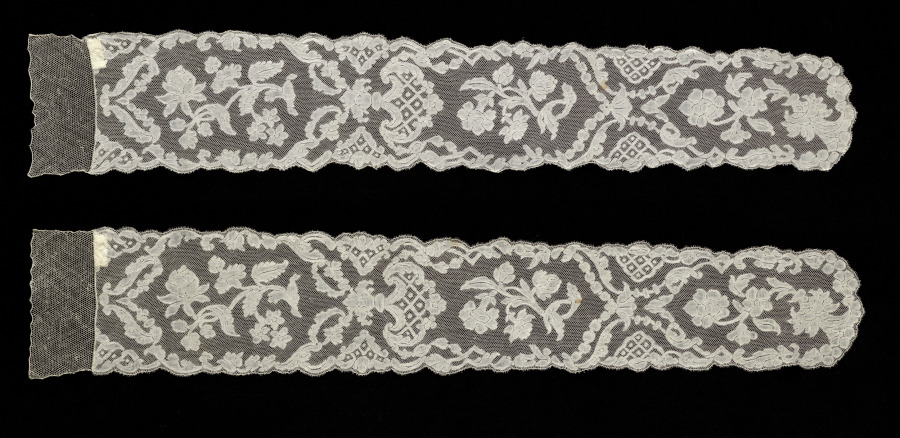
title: Lace Lappets (pair)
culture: France, Valenciennes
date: 1740–60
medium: Linen: bobbin lace (Valenciennes)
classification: Lace